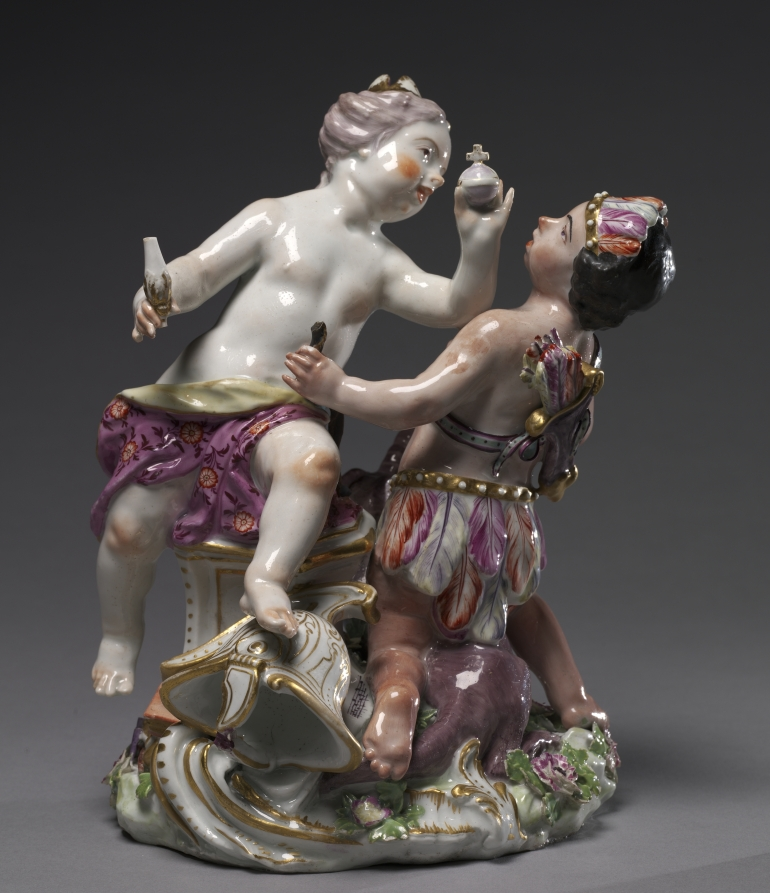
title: Figure of Europe and America from the Four Continents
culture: England, Chelsea, mid-18th century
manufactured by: Chelsea Porcelain Factory (Britain, London, 1745–84)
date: c. 1760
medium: soft-paste porcelain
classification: Ceramic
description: Often collected by wealthy British merchants who were beneficiaries of colonial expansion, figural groups were frequently part of elaborate table decorations meant to signify wealth and global dominance. Here, Europe is seen holding an orb and wearing a crown as queen of the world, suggesting Europe’s supremacy over the other continents. She is entangled with America, who is wearing feathers with a bow and arrow at her feet. This depiction of America reveals a purely imagined understanding of faraway places.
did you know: Figural representations of the four continents date back to the 1500s, but such imagery became even more popular in the 1700s as European empires expanded.